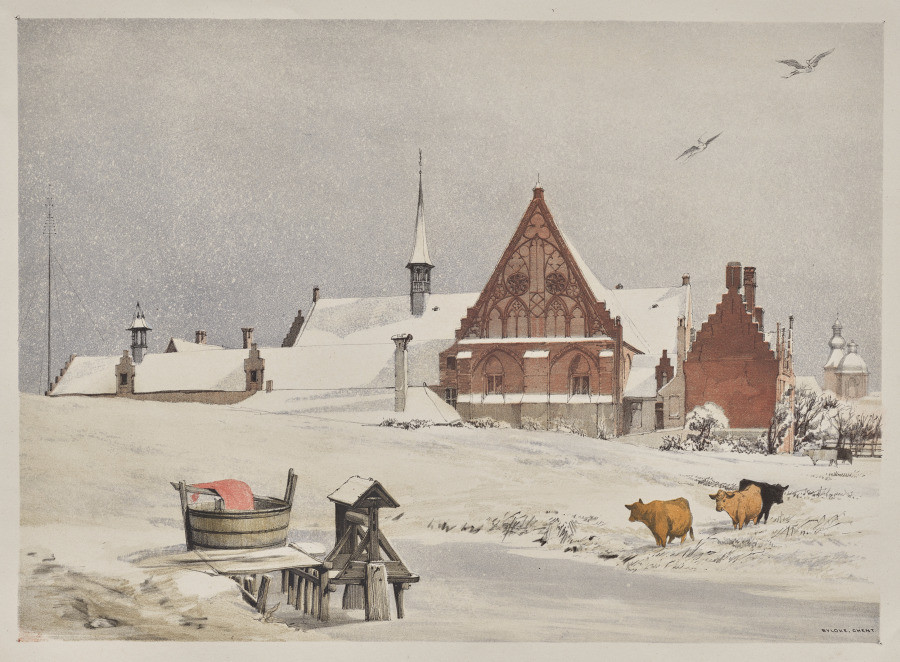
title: Picturesque Architecture in Paris, Ghent, Antwerp, Rouen: Byloke, Ghent, Belgium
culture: England, 19th century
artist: Thomas Shotter Boys (British, 1803–1874)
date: 1839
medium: lithograph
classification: Portfolio